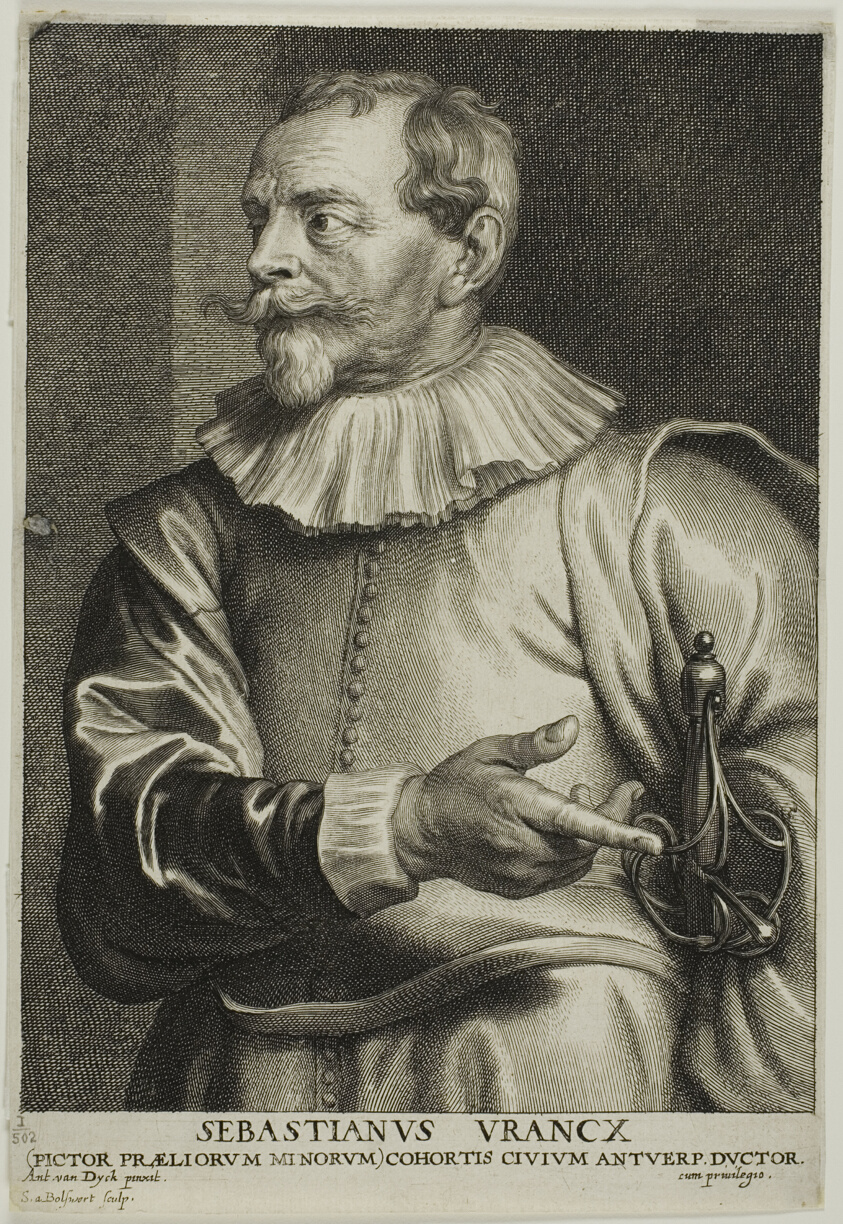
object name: Print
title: Sebastiaan Vrancx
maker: Schelte Adamsz. Bolswert (Dutch, active in Flanders, c. 1586–1659); after Anthony van Dyck (Flemish, 1599-1641)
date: 1630/45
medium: Engraving in black on ivory laid paper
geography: Flanders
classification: engraving; print; prints and drawing